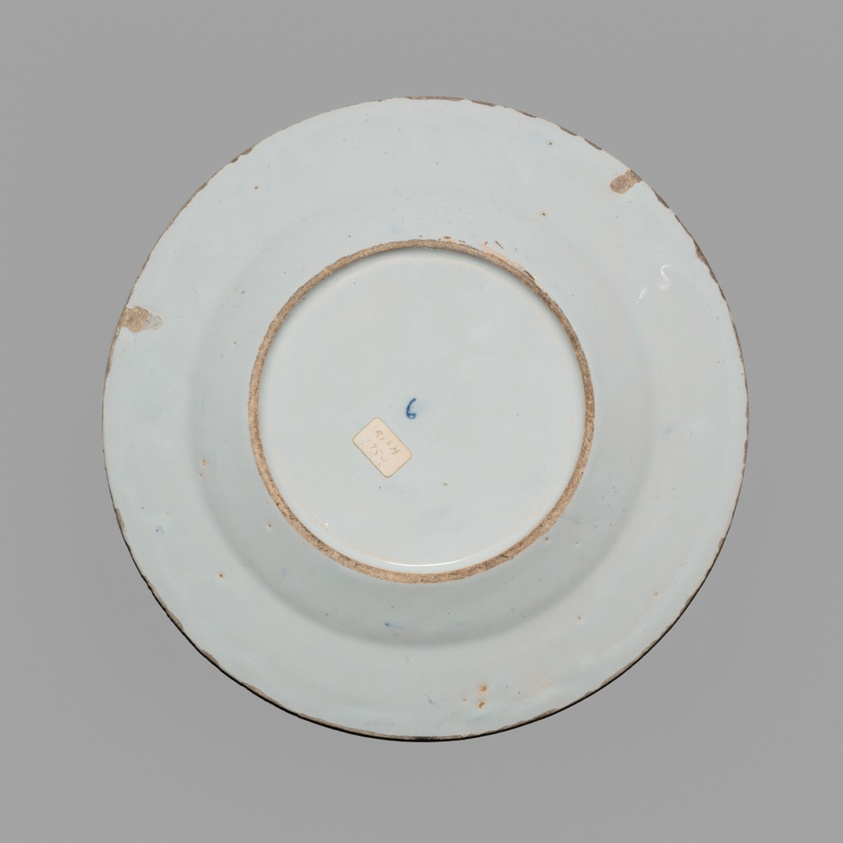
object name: Ceramics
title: Plate in the Three Chinese Houses Pattern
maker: Dublin, Ireland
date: 1760/70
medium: Tin-glazed earthenware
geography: Dublin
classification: earthenware; plate (general, dish); decorative arts; ceramics; european decorative arts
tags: landscapes, Chinoiserie